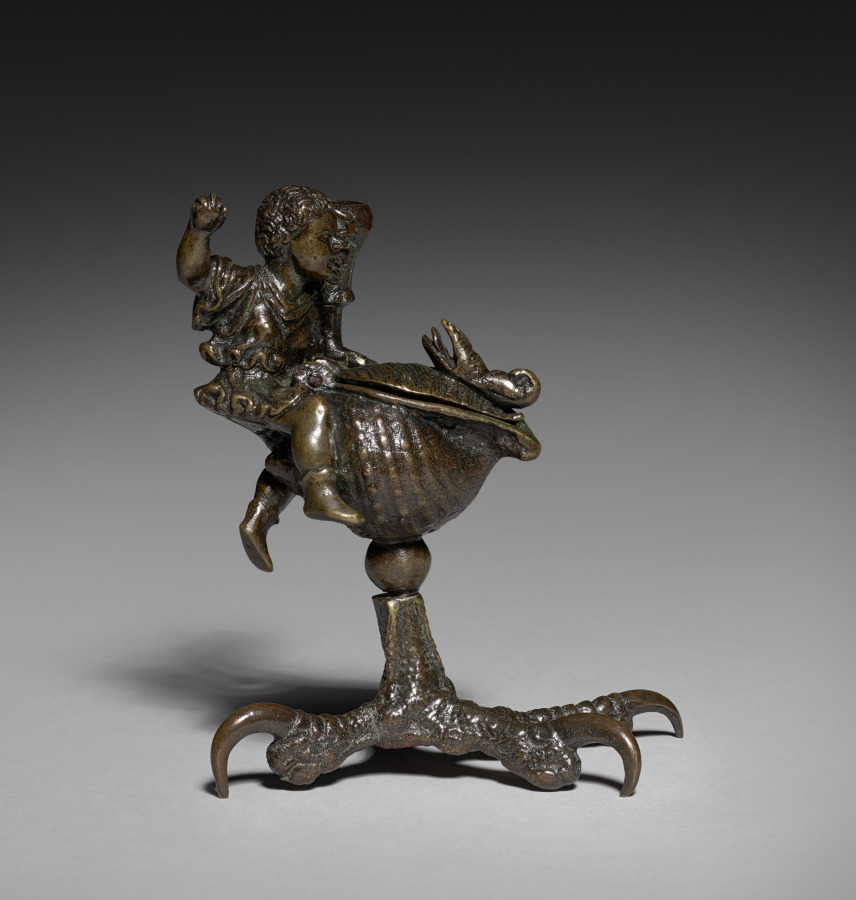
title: Inkwell and Candlestick with the Infant Hercules Killing the Serpents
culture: Italy, Ravenna, 16th century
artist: workshop of Severo da Ravenna (Italian, c.1496–c.1543)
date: c. 1510–20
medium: bronze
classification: Sculpture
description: In the early 1500s, Padua, a center of strong humanist traditions, encouraged the revival of classicism, and artists took their cues from descriptions in the works of classical authors. Classical small-scale bronzes grew in demand, and in response, the city's bourgeoning foundries produced a varied and extensive supply of small statues. Like many early Paduan bronzes, this work's utilitarian function—used to hold ink and to supply light—is complimented by its ornamental value. The base consists of an eagle claw, cast from life, supporting an equally realistic nautilus shell. Though medieval artists had occasionally used seashells to hold paints, the shell inkwell, whose small size makes it rather impractical to use, was a motif particular to Padua. Perched upon the shell is most likely Hercules, the son of Zeus. Perhaps aided by a staff (now missing) he is poised to strike a serpent, which according to myth was sent by Hera, the jealous wife of Zeus, to kill him. The dramatic opposition of hero and monster enhances the connection to the classical past, further meeting the desires of the educated patrons of Padua.